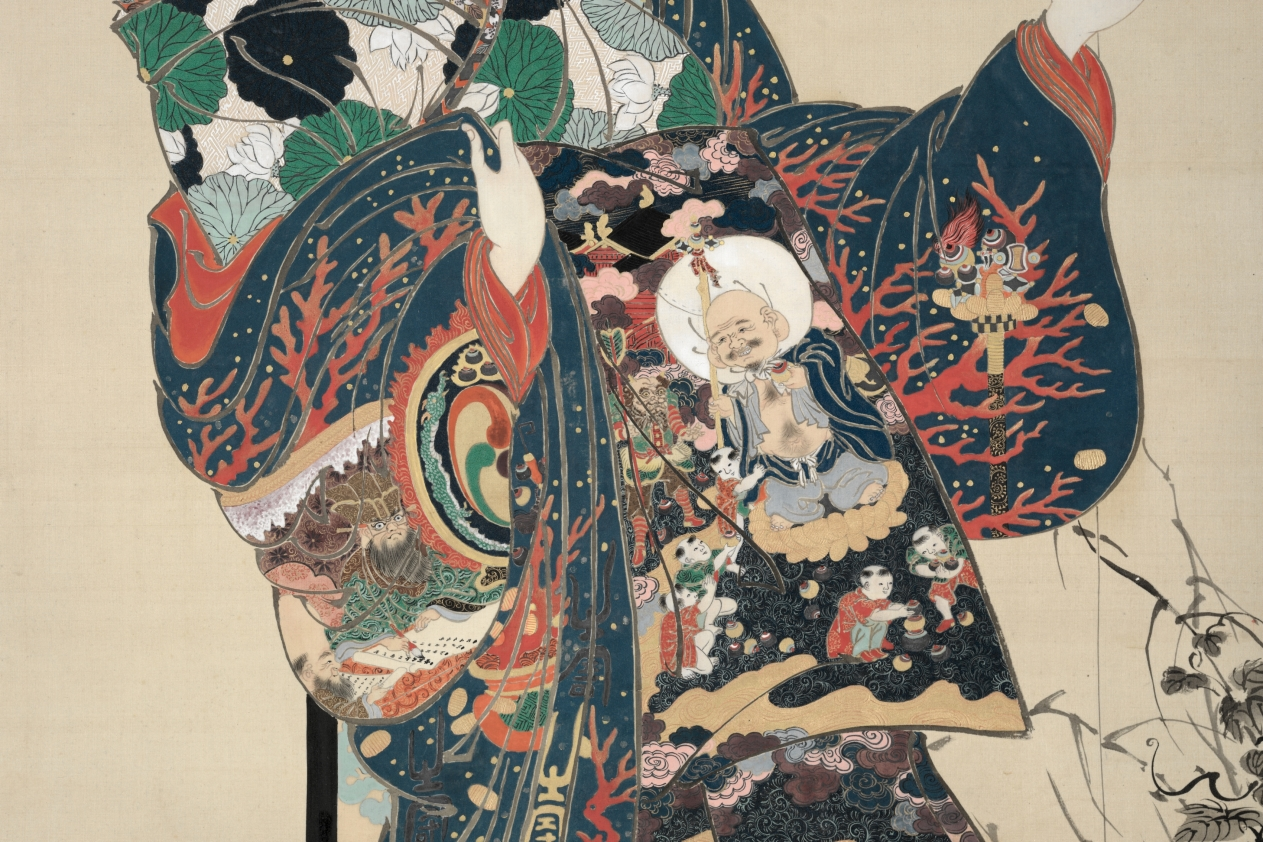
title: Hell Courtesan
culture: Japan, Meiji period (1868–1912)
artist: Kawanabe Kyōsai (Japanese, 1831–1889)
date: 1871–89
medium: Hanging scroll; ink, color, gold, and silver on silk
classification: Painting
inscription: artist's signature and two seals, lower right.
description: Kawanabe Kyōsai repeated this large-scale composition with variations a number of times. In this version, a famous 15th-century courtesan known for wearing a robe with images of the Buddhist hells stands before a folding screen. Legend has it that she was abducted by bandits, and wore the garment to symbolize her belief that her suffering in her current life was punishment for sins committed in a former life. Here, in a parody depiction of the garment, the courtesan stands in for Benzaiten, the goddess of everything that flows, while the remaining members of the Seven Gods of Good Fortune appear on her outer robe. One of them reports sins to Enma, the King of Hell, who is writing out his judgments on the recently deceased.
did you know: The word for longevity appears multiple times in gold and silver on her outer robe.